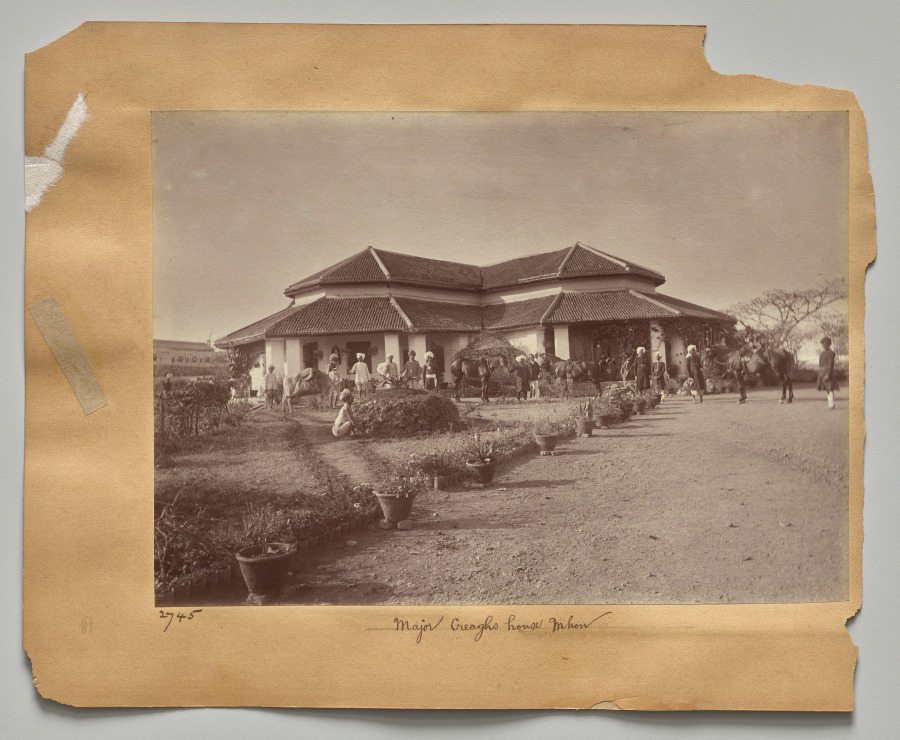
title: Major Creagh's home, Mhon (verso)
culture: India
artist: Raja Deen Dayal (Indian, 1844–1905)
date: c. 1882–87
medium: albumen print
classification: Photograph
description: These photographs are part of an album, now disassembled, of around 105 photographs taken in India between 1885 and summer 1887 that provide glimpses into the lives of the British colonial elite and royal and upper-class Indians. The museum holds another group of 37 pictures from this album (2016.266), which was probably commissioned by a British civil servant visiting or working in India around 1888 as a personal souvenir of his experiences there.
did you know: Raja Deen Dayal is regarded now, and was considered during his lifetime, to be India’s most important 19th-century photographer.